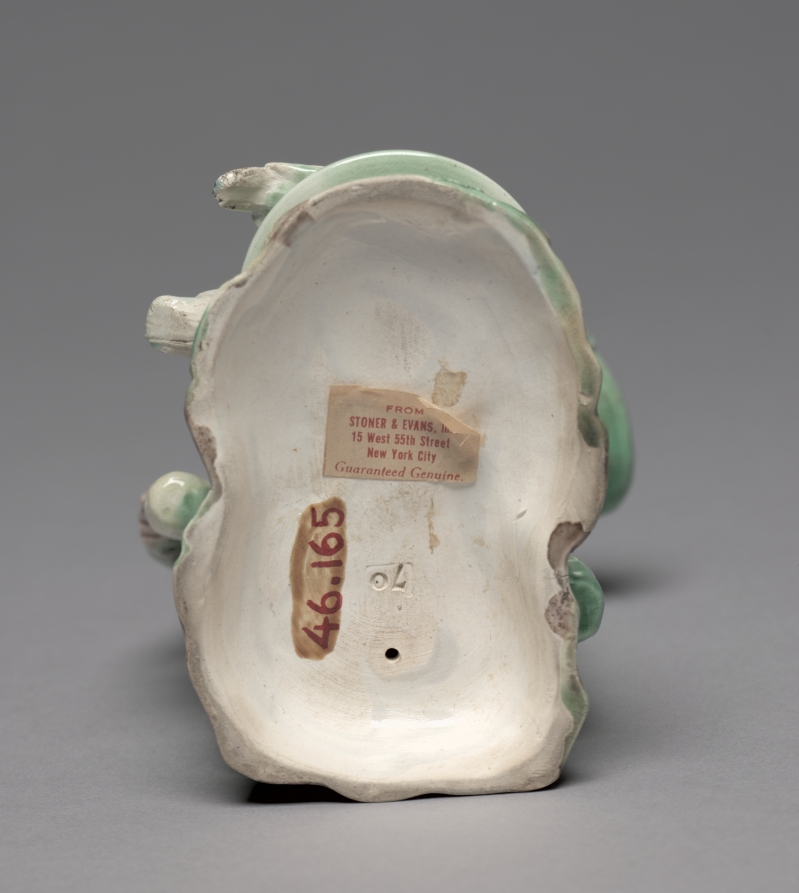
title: Old Woman Feeding Chickens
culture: England, Staffordshire, 18th century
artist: Staffordshire Factory (British)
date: c. 1770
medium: earthenware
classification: Ceramic